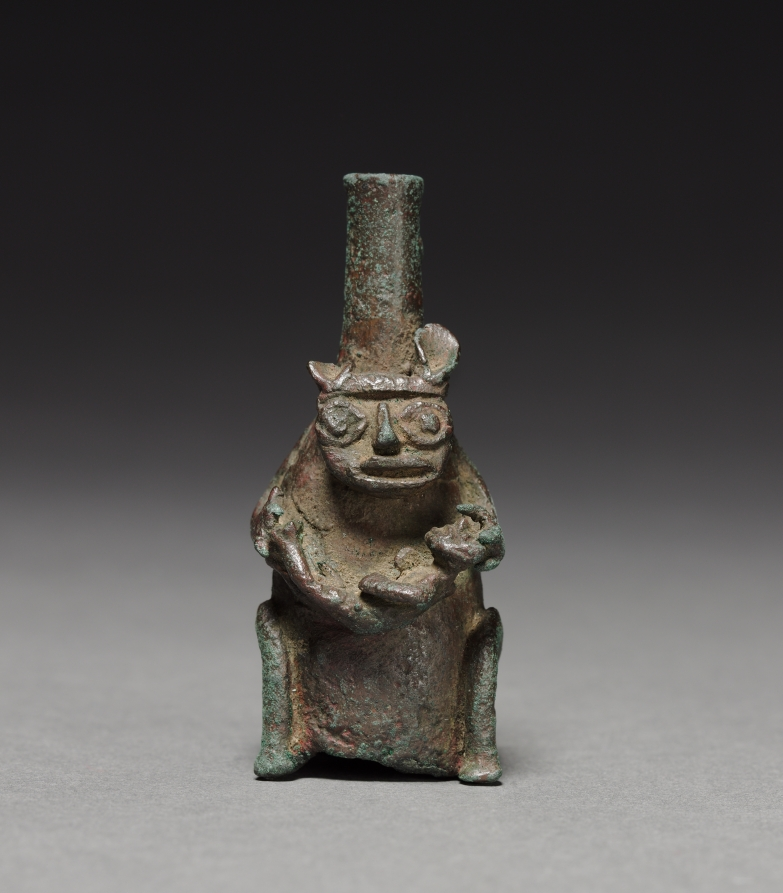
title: Feline Holding Human Figure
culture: Peru, North Coast, Moche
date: c. 100–500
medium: banded travertine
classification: Metalwork